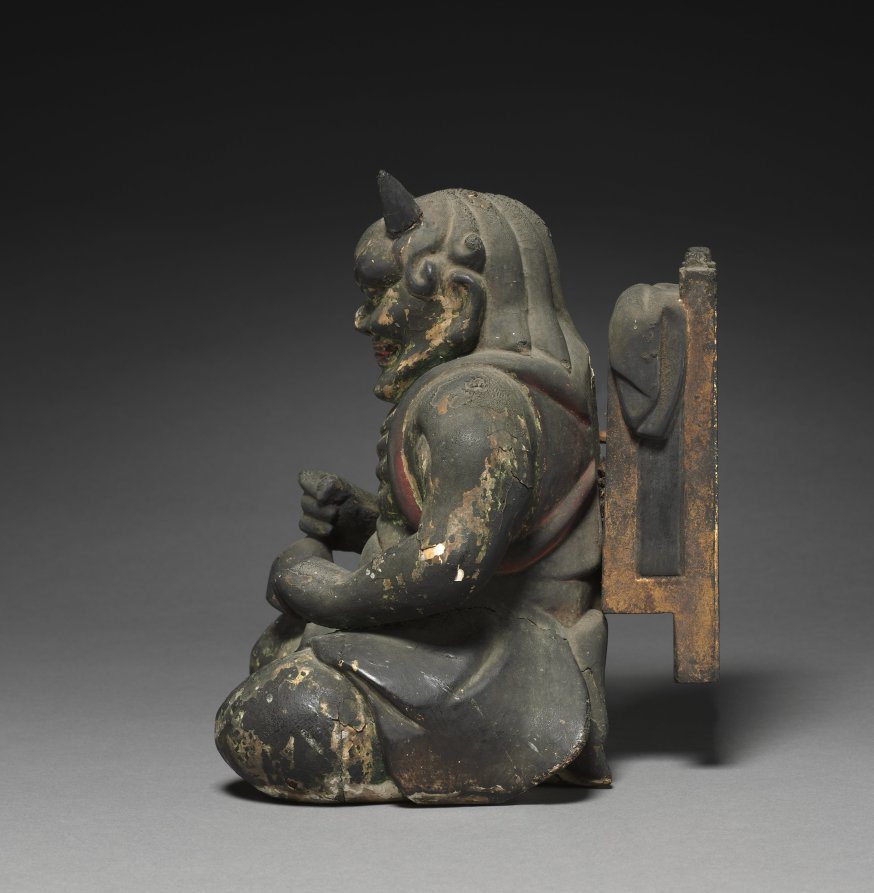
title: Seated Koki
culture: Japan, Muromachi period (1392–1573)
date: 1400s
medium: wood with pigment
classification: Sculpture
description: The axe-wielding red Zenki, and the vase-holding, bamboo backpack-wearing green Koki are both under the mystical control of the monk, En no Ozunu (legendarily 634–701), also known as En no Gyōja, or “En the Ascetic,” considered to have founded Shugendō, a style of religious practice focused on performing austerities in mountainous settings.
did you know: This sculpture was hand-carved and covered with gesso, then paint in green, white, red, yellow, orange, and black, and gilded in select areas.